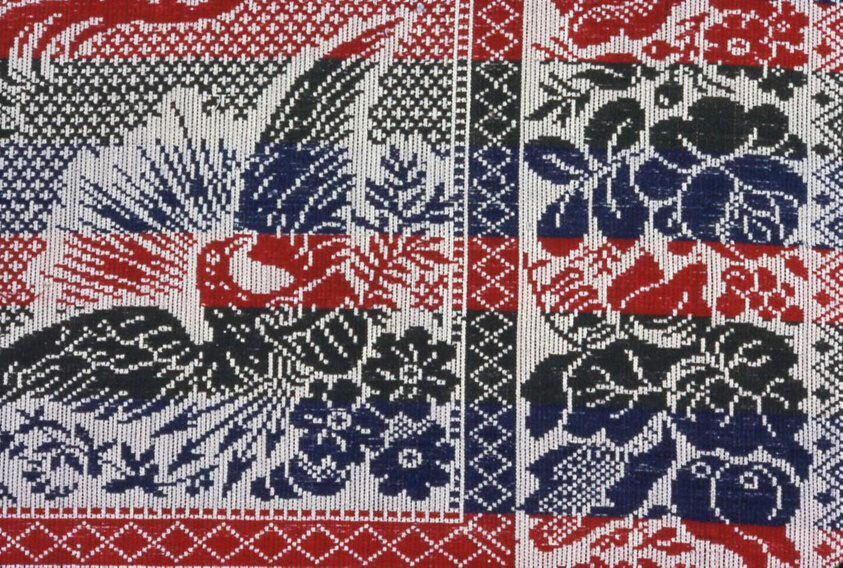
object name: Textile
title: Coverlet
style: 19th century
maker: United States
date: 1870/76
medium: Cotton and wool, plain weave with plain interlacings of secondary binding warps and patterning wefts (Beiderwand); woven on loom with Jacquard attachment; full loom width; seamless; fringed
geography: United States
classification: weaving - coverlet; coverlet; weaving; textile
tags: eagles, zigzags, wreaths, diamond shapes, vines, fruit, roses, flowers, foliage, scalloping, star, arrows, medallions, coverlet